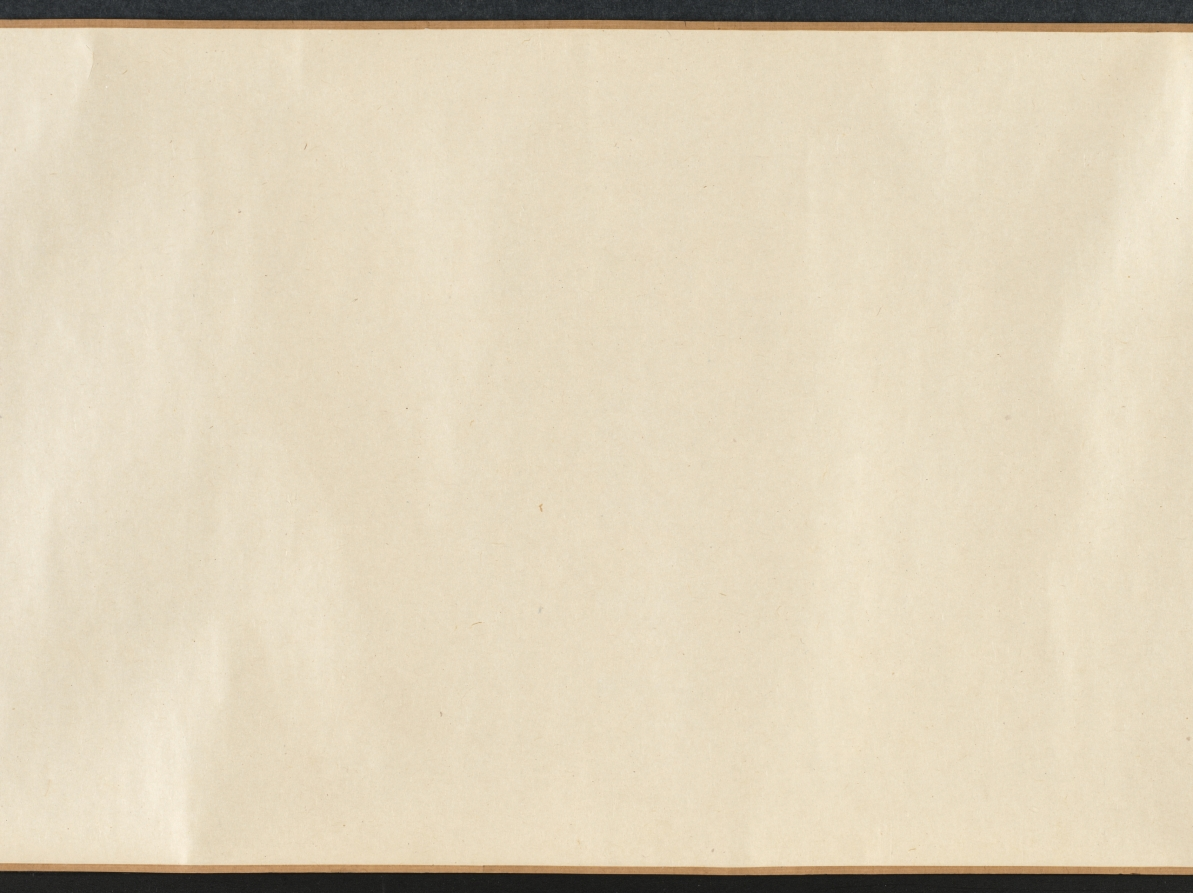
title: Landscape with Bamboo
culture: China, Yuan dynasty (1271-1368)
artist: Song Ke (Chinese, 1327–1387)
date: 1300s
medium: Handscroll; ink on paper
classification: Painting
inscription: 東吳宋克戲為仲幾畏友圖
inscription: 2 colophons and 14 additional seals: 1 seal of Yü Chung-chi (14th c.); 1 seal of Wu Ch'eng (1469 jinshi); 1 colophon and 2 seals of Wu K'uan (1435–1504); 1 colophon and 9 seals of Cheng Qi (1911–1988); 1 seal unidentified.